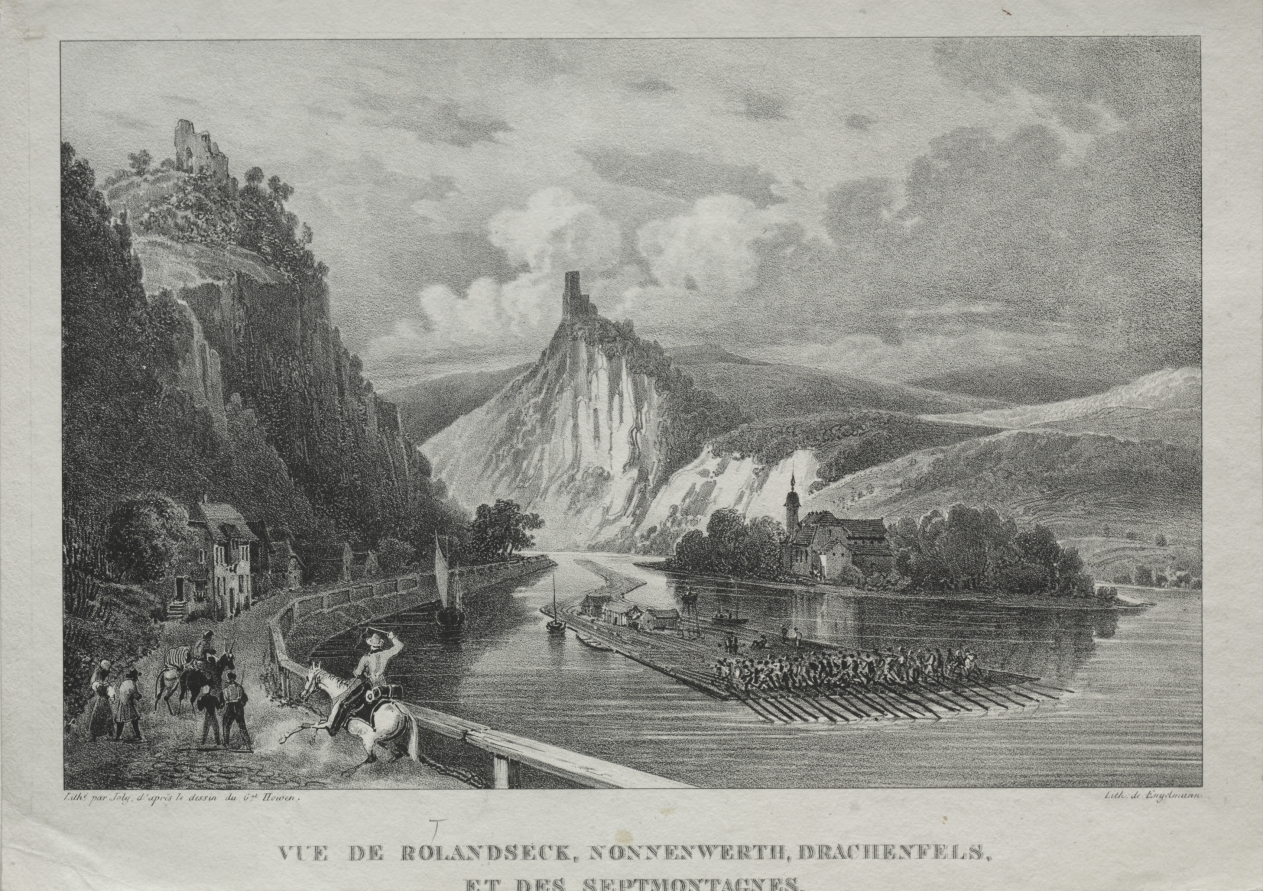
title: View of Rolandseck, Nonnenwerth, Drachenfels and Siebenbirge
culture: France, 19th century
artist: Jules Jean-Baptiste de Joly (French, 1788–1865)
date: 1800s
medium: lithograph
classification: Print